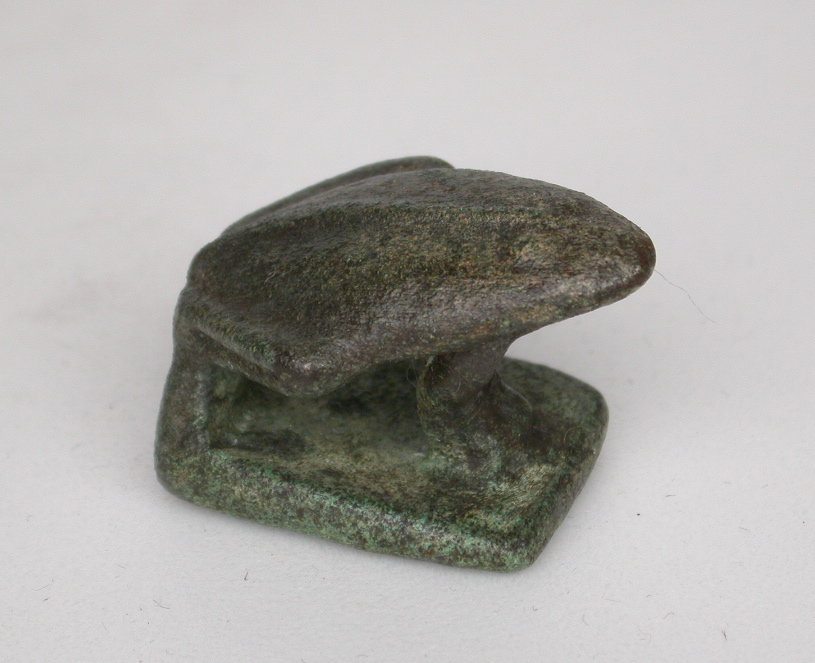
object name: Costume and Accessories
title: Weight in the Form of a Frog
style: new kingdom, ancient, egyptian, eighteenth dynasty, nineteenth dynasty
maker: Egyptian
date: New Kingdom, about 1550-1069 BCE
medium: Copper alloy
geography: Egypt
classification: amulet; bronze; metal; ancient art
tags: frog